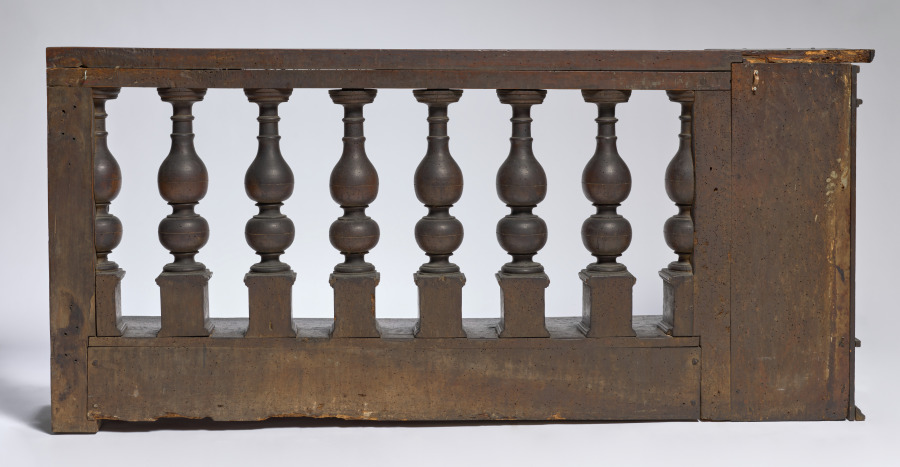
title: Balustrade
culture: Italy, 17th century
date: c. 1630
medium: carved and turned walnut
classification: Furniture and woodwork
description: This balustrade, or railing, was probably intended for use in a private house, perhaps to set off a bed alcove.